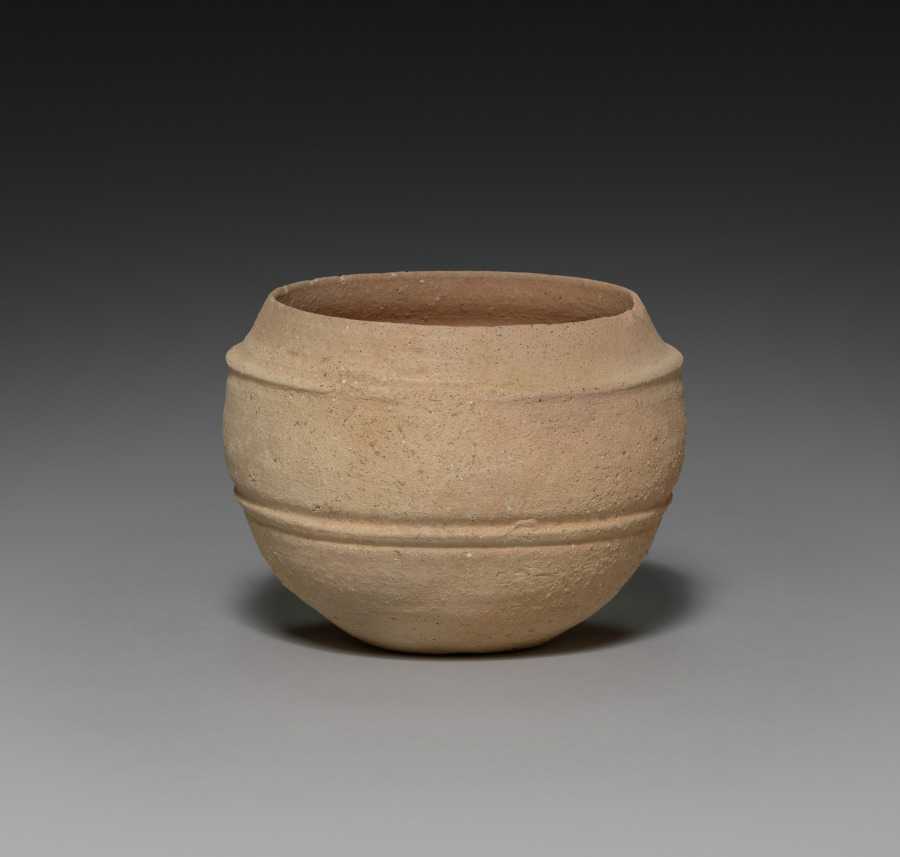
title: Lidded Jar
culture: Korea, Silla (57 BC-935) or Kaya (AD 42-562) period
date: 400s–500s CE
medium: red earthenware with incised band designs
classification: Ceramic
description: Early earthenware from the Three Kingdoms period (57 BCE–668) became widely utilized as agriculture and religion grew to be essential elements in sustaining society and its systems. The clay jars of different sizes and shapes on display were made for the following purposes: some were used to store harvested grains and seeds, some, especially lidded ones such as this, to preserve cremated remains, and some to serve offerings in rituals.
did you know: Closed kilns built on hillsides became widely used for producing this type of pottery vessel in Korea during the Three Kingdoms period.